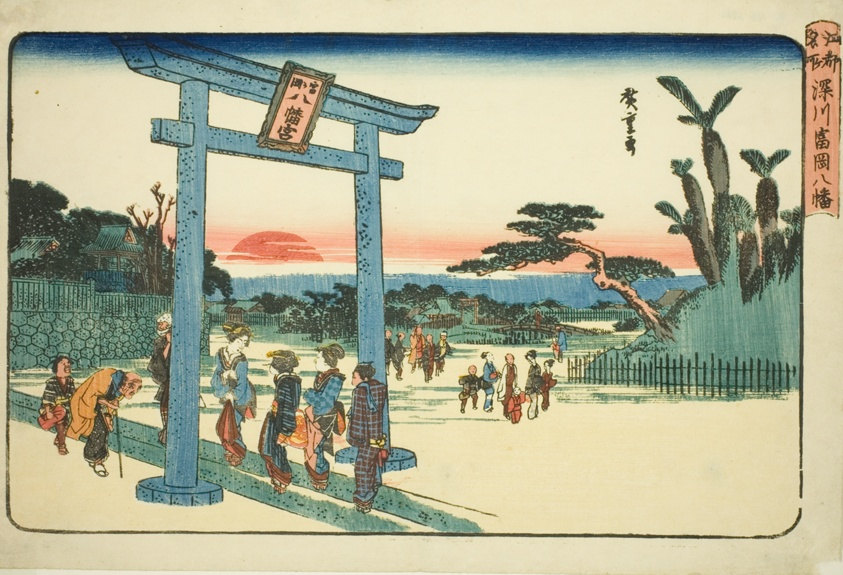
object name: Print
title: The Tomigaoka Hachiman Shrine at Fukagawa (Fukagawa Tomigaoka Hachiman), from the series "Famous Places in Edo (Koto meisho)"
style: Japanese (culture or style)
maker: Utagawa Hiroshige 歌川 広重; Japanese, 1797-1858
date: c. 1832/34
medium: Color woodblock print; oban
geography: Japan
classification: woodblock print; print; asian art